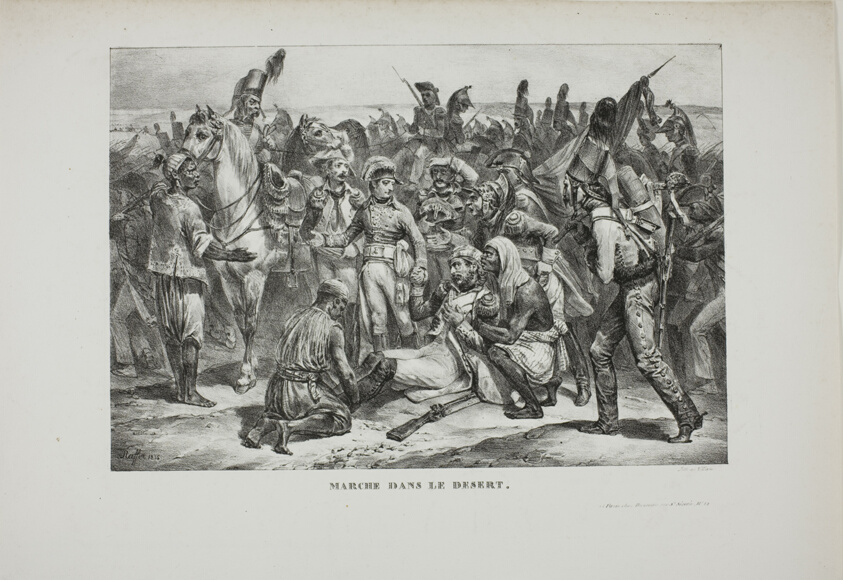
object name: Print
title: Desert March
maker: Denis Auguste Marie Raffet (French, 1804-1860); printed by François le Villain (French, active 19th century); published by Chez Decrouan (French, active 19th century)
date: 1826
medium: Lithograph in black on ivory wove paper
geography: France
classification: lithograph; print; prints and drawing